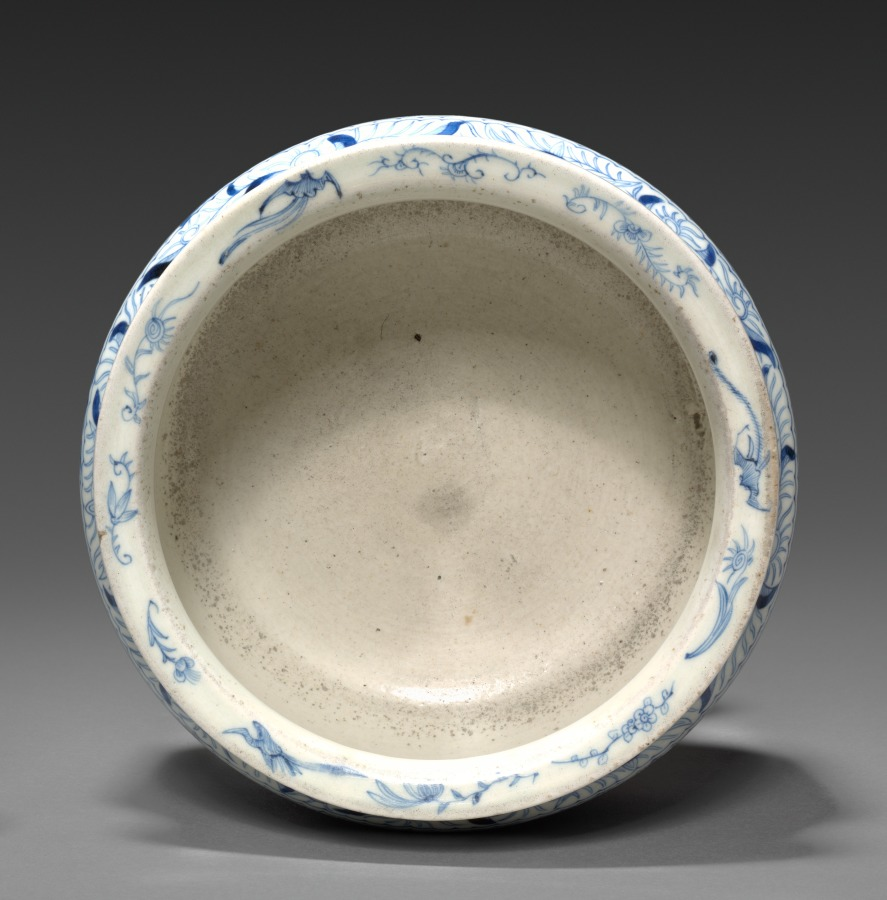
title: Jar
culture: Japan, Edo period (1615–1868)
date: early to mid-1800s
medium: porcelain with underglaze blue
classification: Ceramic